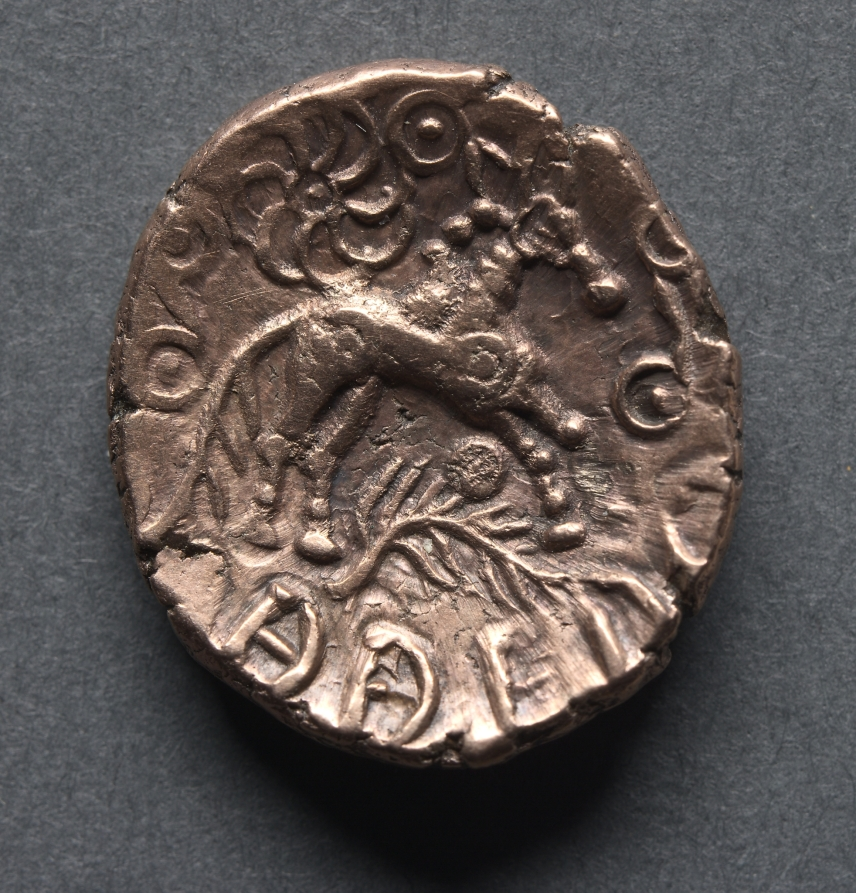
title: Addedomaros Stater: Crescents (obverse)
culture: England, Catuvellauni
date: 50 BCE–10 CE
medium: gold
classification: Coins